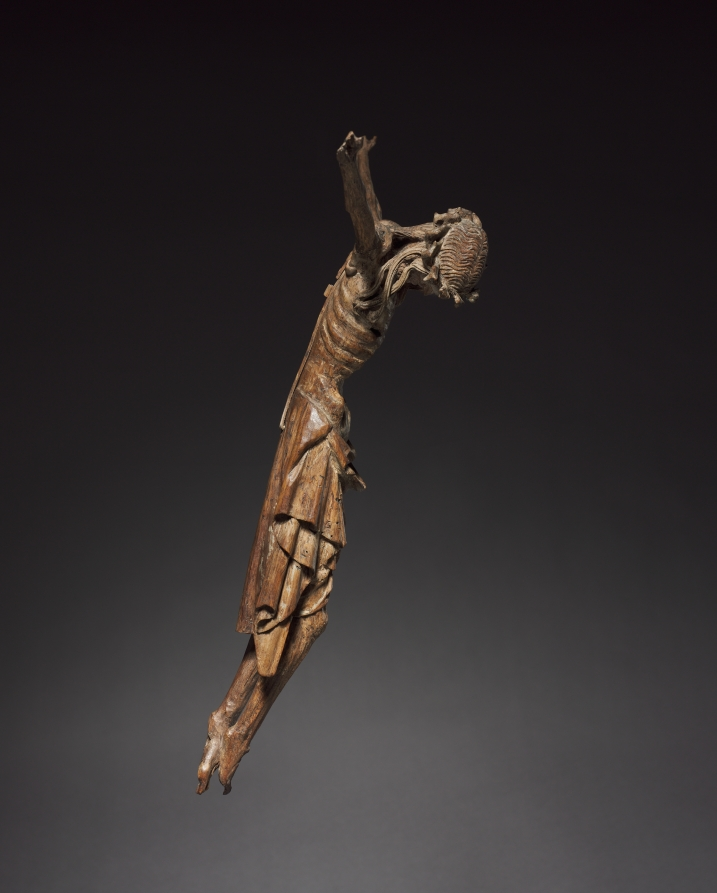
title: Crucified Christ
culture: Germany, Cologne, 14th century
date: c. 1340–1350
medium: wood (walnut) once polychromed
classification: Sculpture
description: The striking impression of this figure is the vivid representation of suffering. The sculpture captures the moment after Christ’s death: the drooping head on a frail neck is a mask of agony. The eyes are nearly shut, the mouth is ajar, and the forehead crowned by heavy, gouging thorns is drawn with pain. The elongation of the body is emphasized by the emaciated chest with protruding ribs and bony limbs. The resulting sense of frailty and pathos is augmented by the heavy strands of hair that uncurl alongside the tormented face and by the loincloth folds that break the downward drape of the body. The sculpture belongs to a group of emotional crucifixes and pietas carved in the Middle-Rhine region for over a century beginning around 1300, examples of which are principally found in the city of Cologne. Such sculptures appealed to the Rhenish mystics, who advocated meditation based on the Passion of Christ.